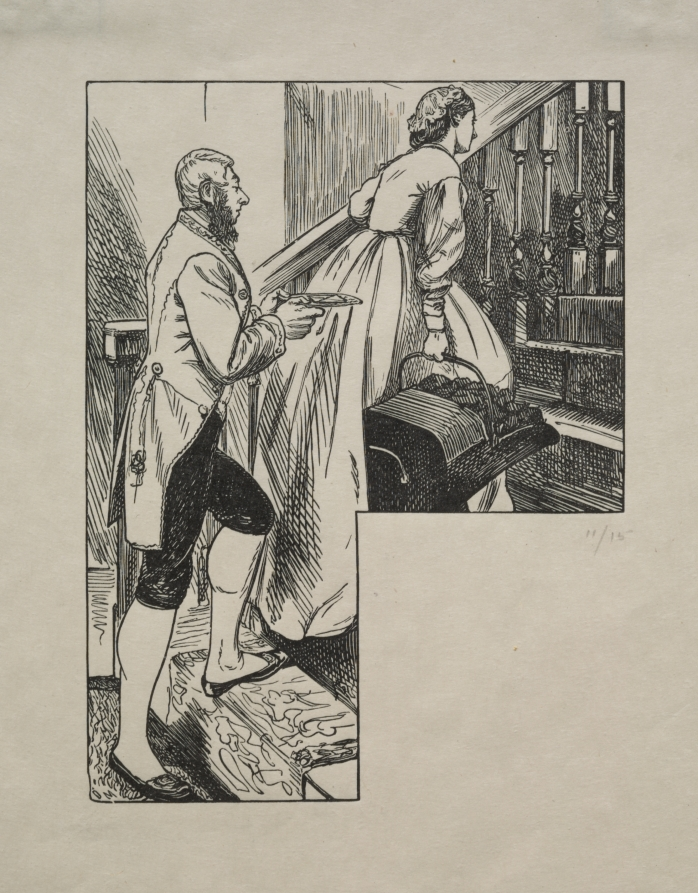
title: Housekeeping in Belgravia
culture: England, 19th century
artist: George Louis Palmella Busson Du Maurier (British, 1834–1896)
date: 1863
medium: wood engraving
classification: Print